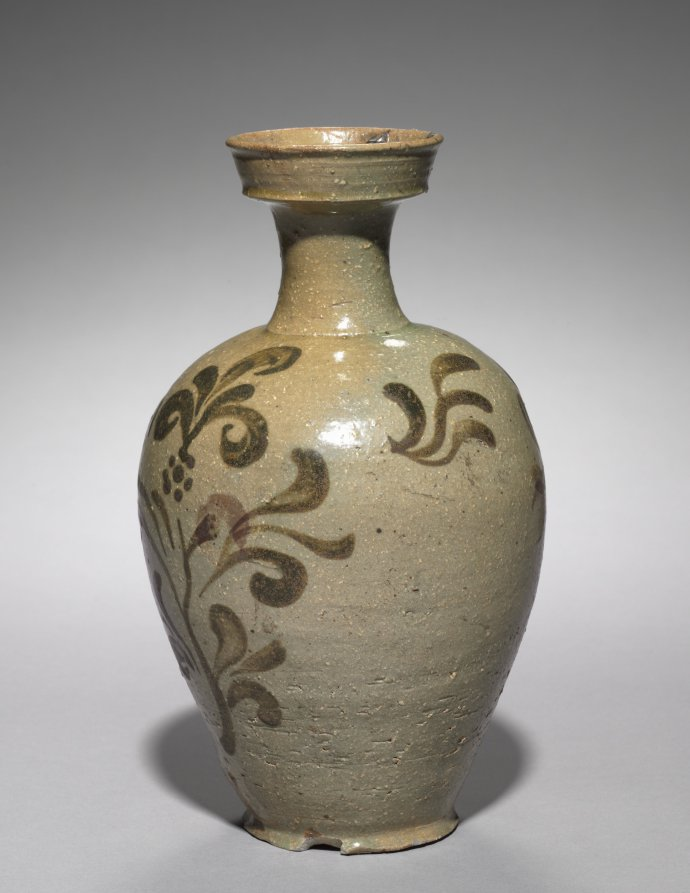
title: Vase with Floral Design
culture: Korea, Goryeo dynasty (918–1392)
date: 1100s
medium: celadon with underglaze iron-brown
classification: Ceramic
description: This bottle painted with iron-rich pigment beneath celadon glaze was probably produced in Haenam kilns in southern Jella province. The method that paints patterns in iron-oxide pigment is believed to have developed in kilns in China, such as Xicun in Guangzhou, Cizhou and Ding in Hebei province, and Yaozhou in Shaanxi province around the 900s.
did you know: This bottle was painted with iron-rich pigment beneath celadon glaze.